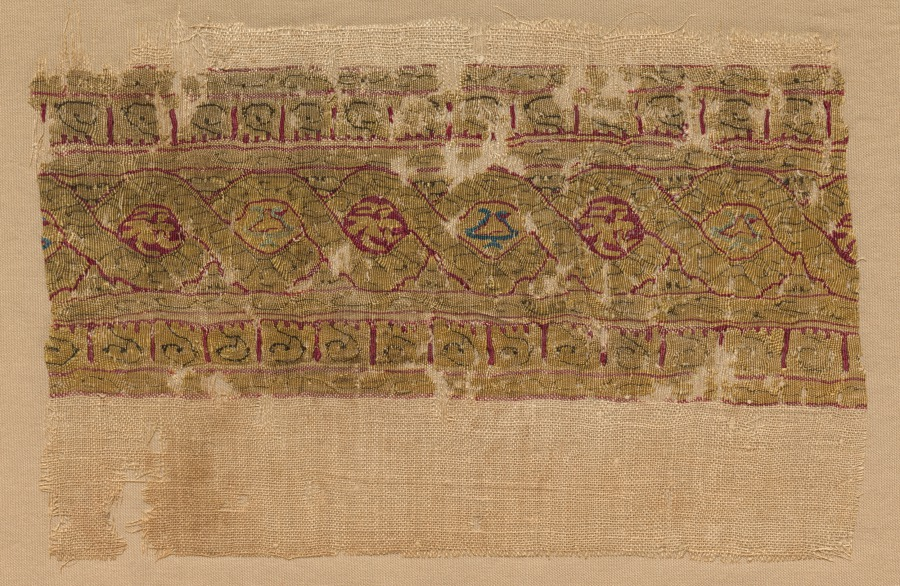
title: Fragment of a Tiraz-Style Textile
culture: Egypt, Fatimid period, Caliphate of al-Hafiz, AH 524-44 (A.D. 1130 - 1149)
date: 1130 – 1149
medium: tabby ground with inwoven tapestry ornament; linen and silk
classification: Textile